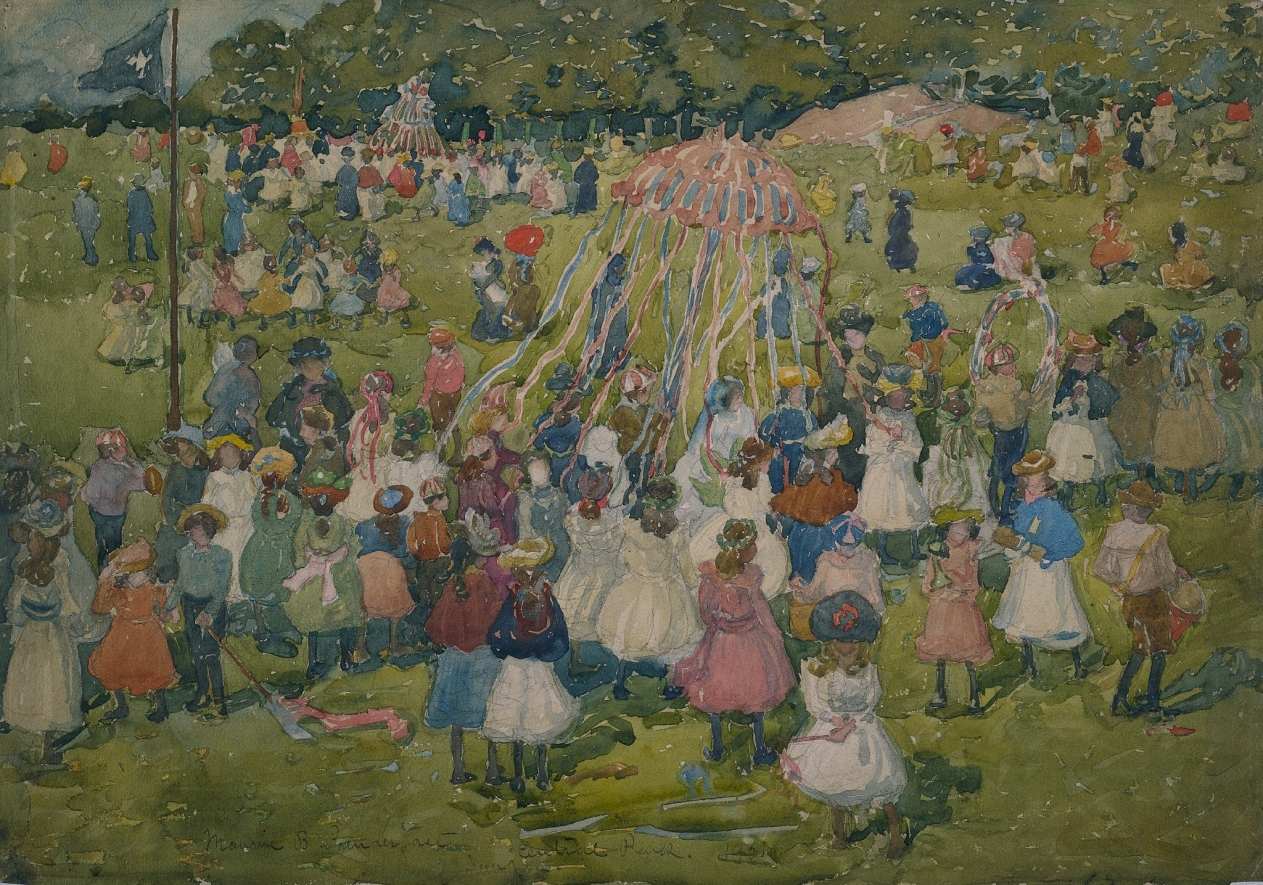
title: May Day, Central Park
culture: America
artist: Maurice Prendergast (American, born Newfoundland [now Canada], 1858–1924)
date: 1901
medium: watercolor over graphite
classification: Drawing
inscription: signed, across bottom, in brown ink: Maurice B. Prendergast Central Park. 1901. / New York.; verso, upper left, in graphite: No 22; center, in graphite: May Day Central Park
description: Maurice Prendergast worked primarily in watercolor, and Central Park—seen in this drawing— was one of his favorite subjects. He regularly visited the popular public area in New York City during the early 1900s, while he was living in Boston. Prendergast's depictions of Central Park often focus on festivities and celebrations, continuing a theme he had explored in other cities, such as Paris and Venice. Here, the artist depicted children celebrating May Day by dancing with colorful ribbons around a Maypole on a sunny day. He worked with rapid, loose marks, leaving portions of the paper visible to create highlights throughout. Prendergast was drawn to this subject, and revisited it many times.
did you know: Maurice Prendergast studied in Paris and was influenced by the French Impressionists and their focus on modern urban life.